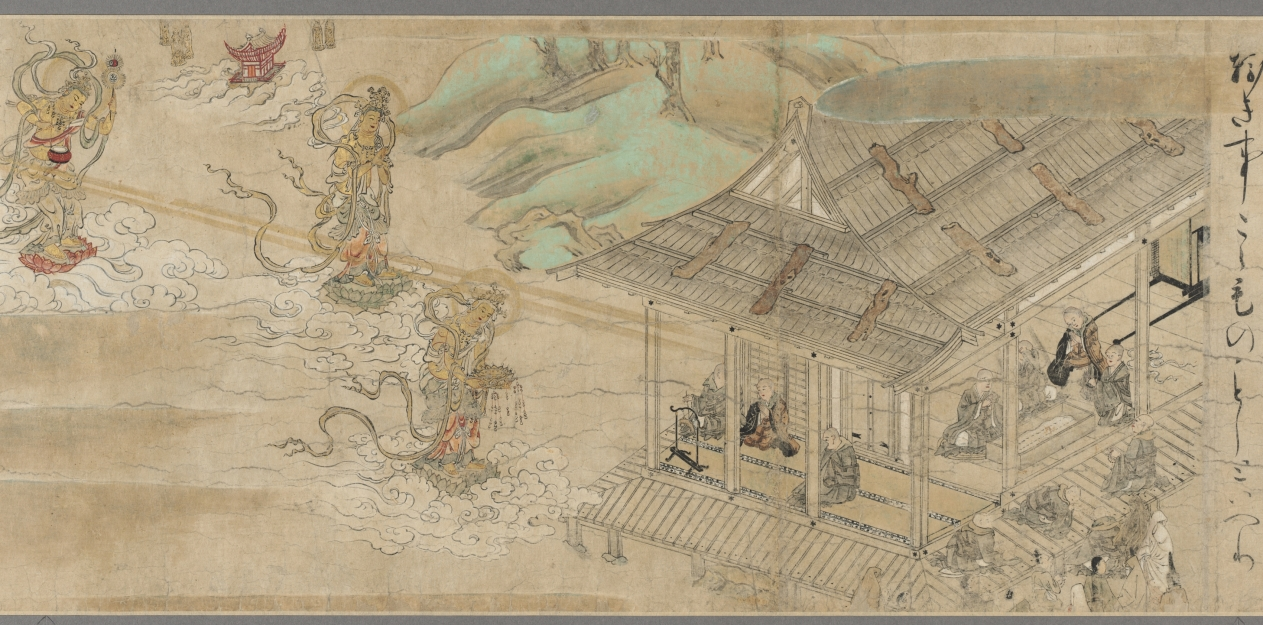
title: The Illustrated Miraculous Origins of the Yūzū Nenbutsu School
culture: Japan, Kamakura period (1185–1333)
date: early 1300s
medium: Handscroll; ink, color, and gold on paper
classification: Painting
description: This painting is the second of a set of two illustrated handscrolls. The first scroll depicts the biography of the Japanese Buddhist monk Ryōnin. This scroll begins with scenes of Ryōnin’s death and relates episodes illustrating the efficacy of following his teachings. Ryōnin asserted the total interconnectedness of all things and the spiritual benefit of chanting the name of the Buddha Amida for one another.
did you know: The other scroll from this two-scroll set belongs to the Art Institute of Chicago.